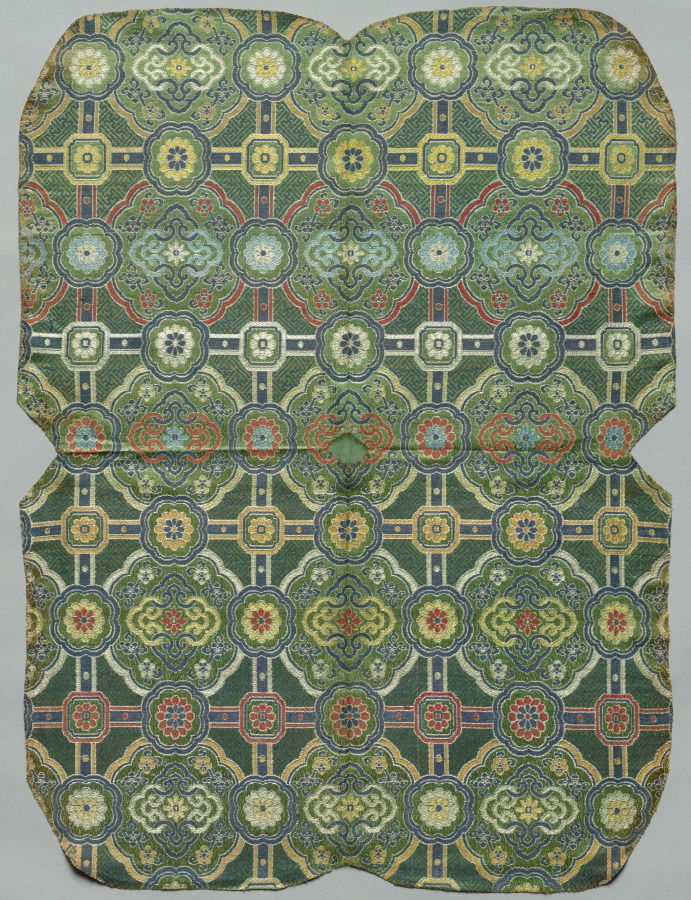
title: Textile Fragment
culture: Japan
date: 1800s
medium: plain compound satin; silk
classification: Textile